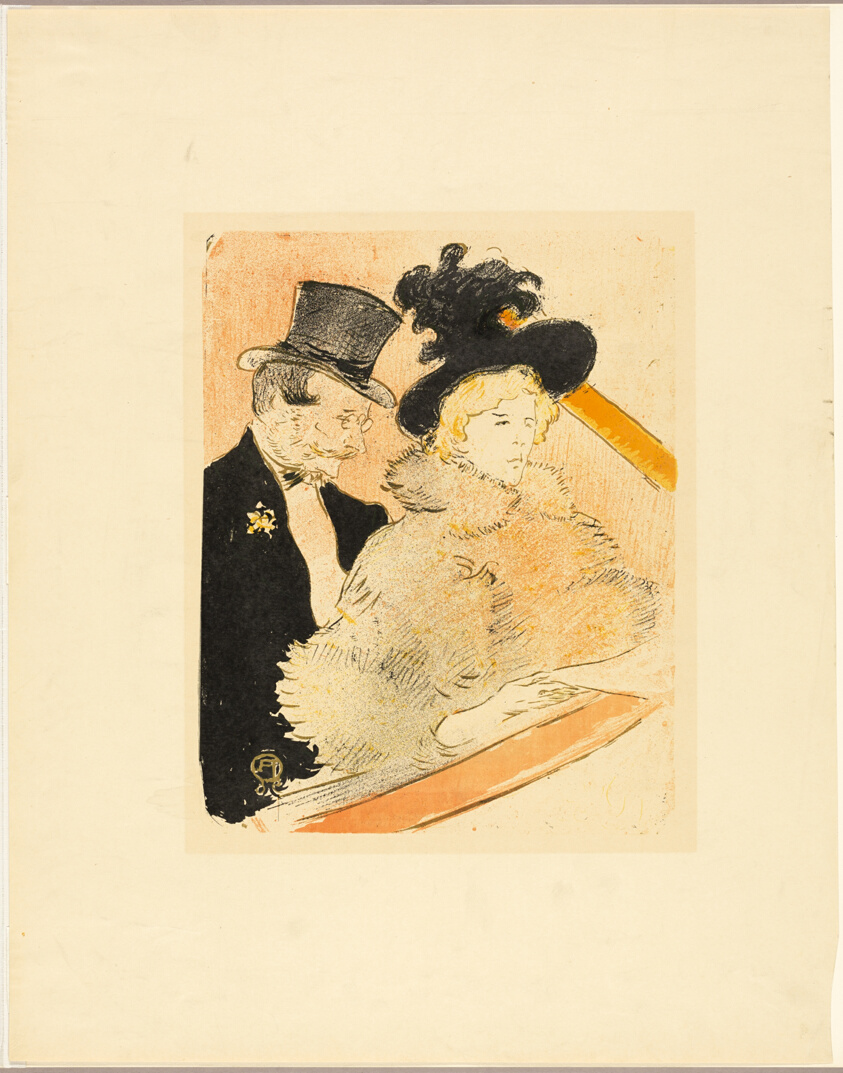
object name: Print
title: At the Concert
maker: Henri de Toulouse-Lautrec (French, 1864-1901)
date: 1896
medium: Color zincograph on cream wove paper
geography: France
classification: zincograph; print; prints and drawing